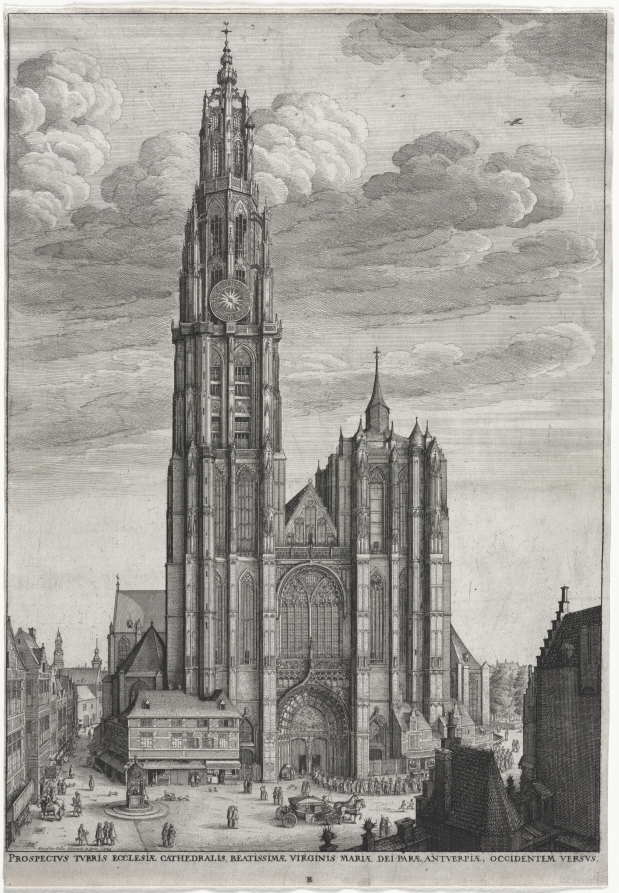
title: Antwerp Cathedral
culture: Bohemia, 17th century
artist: Wenceslaus Hollar (Bohemian, 1607–1677)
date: 1649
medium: etching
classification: Print